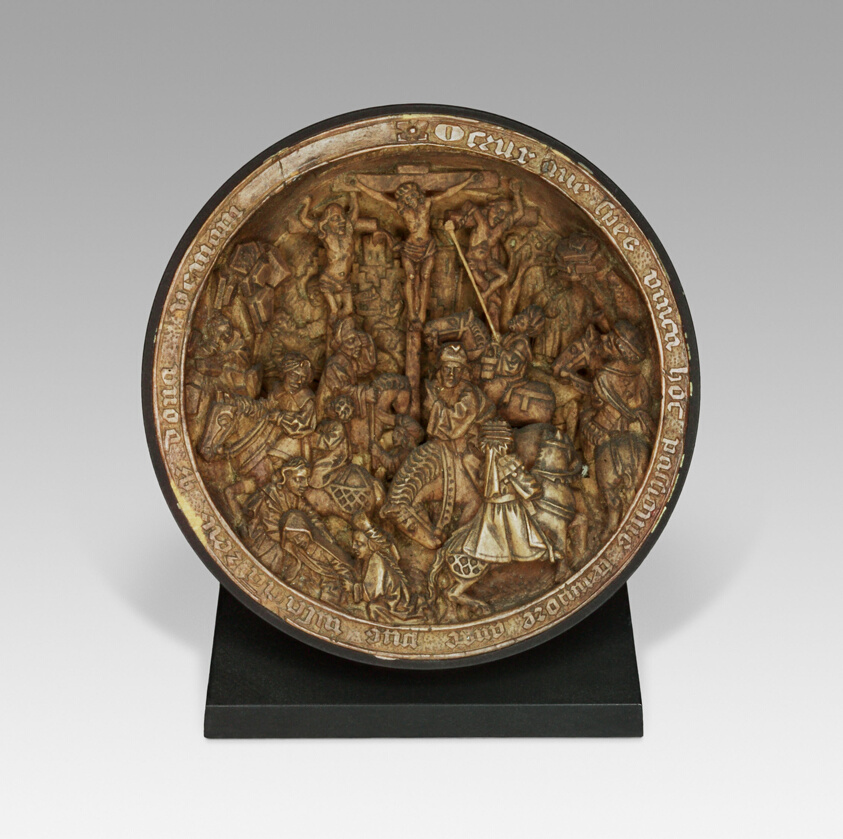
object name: Sculpture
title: Crucifixion Relief from a Rosary Bead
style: sixteenth century, 16th Century, Flemish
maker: Flemish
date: 1500/25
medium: Boxwood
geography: Flanders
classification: functional object; sculpture; bead; flemish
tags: crucifixions, animals, armor, Christian subjects, Christianity, death, figures, horse, horses, Jesus, men, people, religion, religious, religious figures, religious scenes, soldiers, women